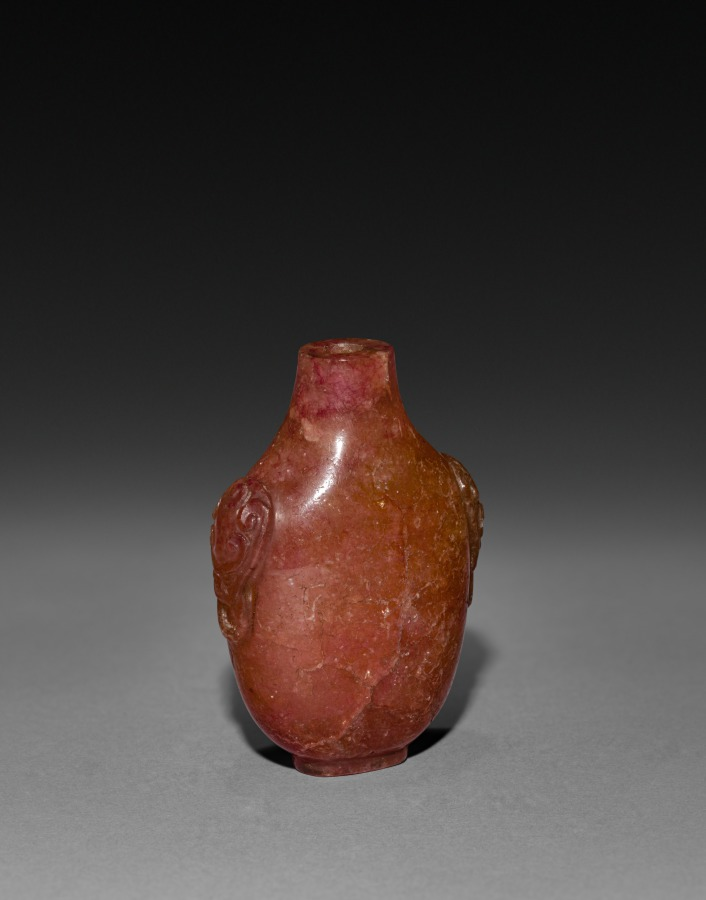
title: Snuff Bottle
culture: China, Qing dynasty (1644-1911)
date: 1644–1911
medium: glass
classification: Glass